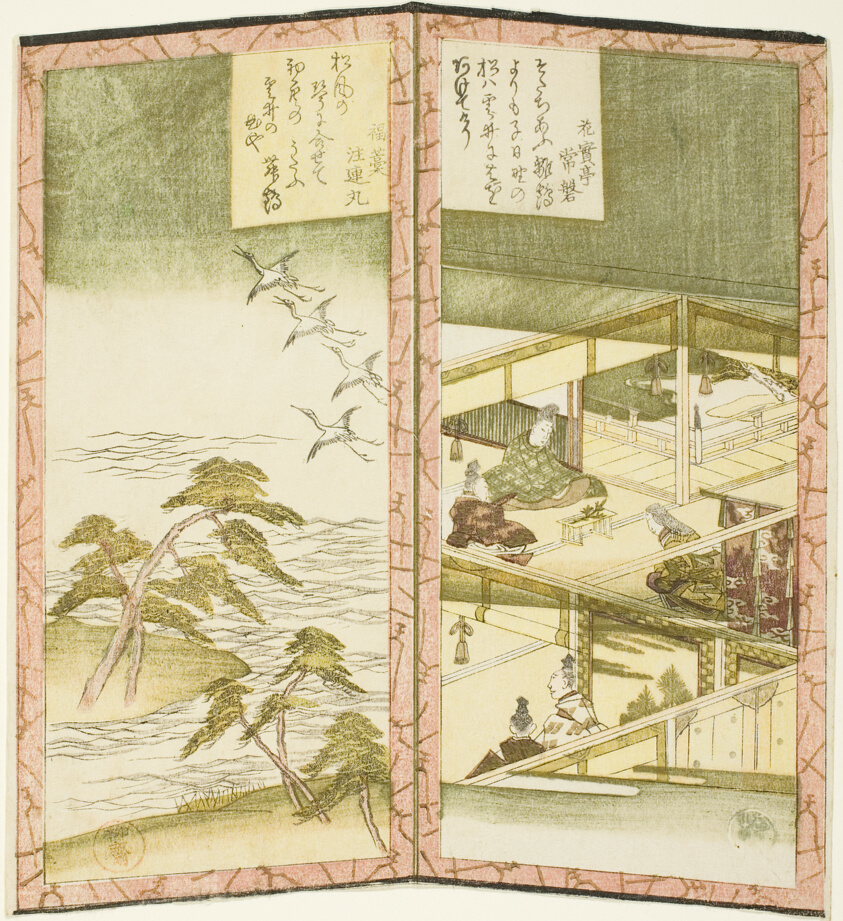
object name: Print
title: Palace interior and beach, from an untitled hexaptych depicting a pair of folding screens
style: Japanese (culture or style)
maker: Ryuryukyo Shinsai (Japanese, c. 1764-1820)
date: c. 1825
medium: Color woodblock print; sheet from shikishiban hexaptych, surimono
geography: Japan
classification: woodblock print; print; asian art